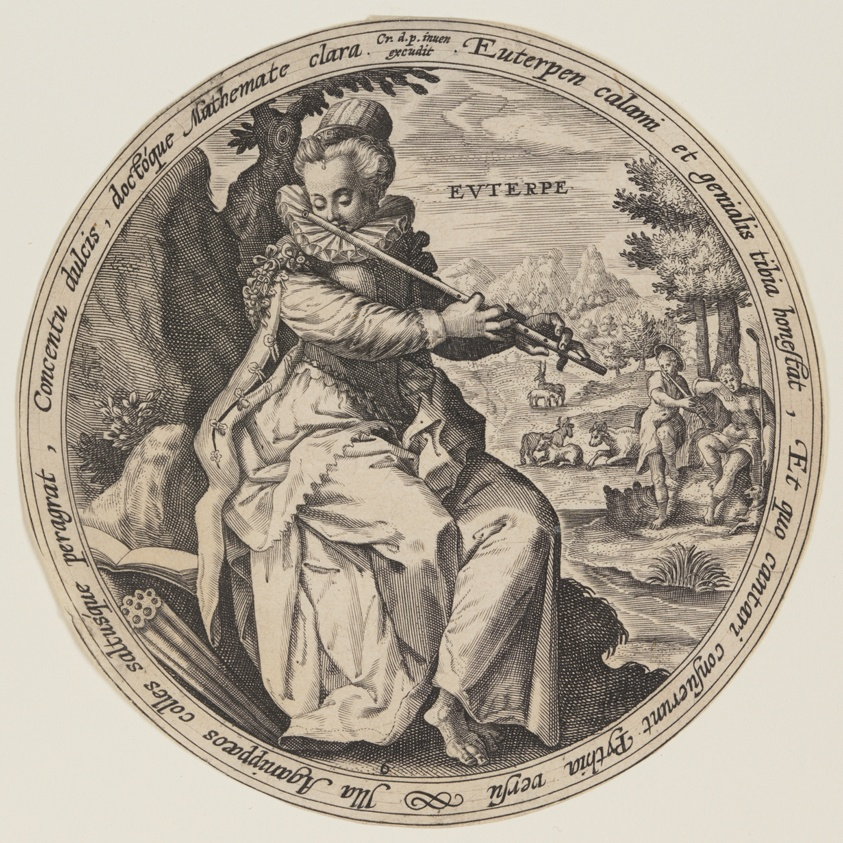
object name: Print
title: Calliope, from The Muses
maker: Crispijn van de Passe I; Dutch, c. 1565–1637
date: c. 1590-1620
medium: Engraving on ivory laid paper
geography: Netherlands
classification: engraving; paper; print; prints and drawing